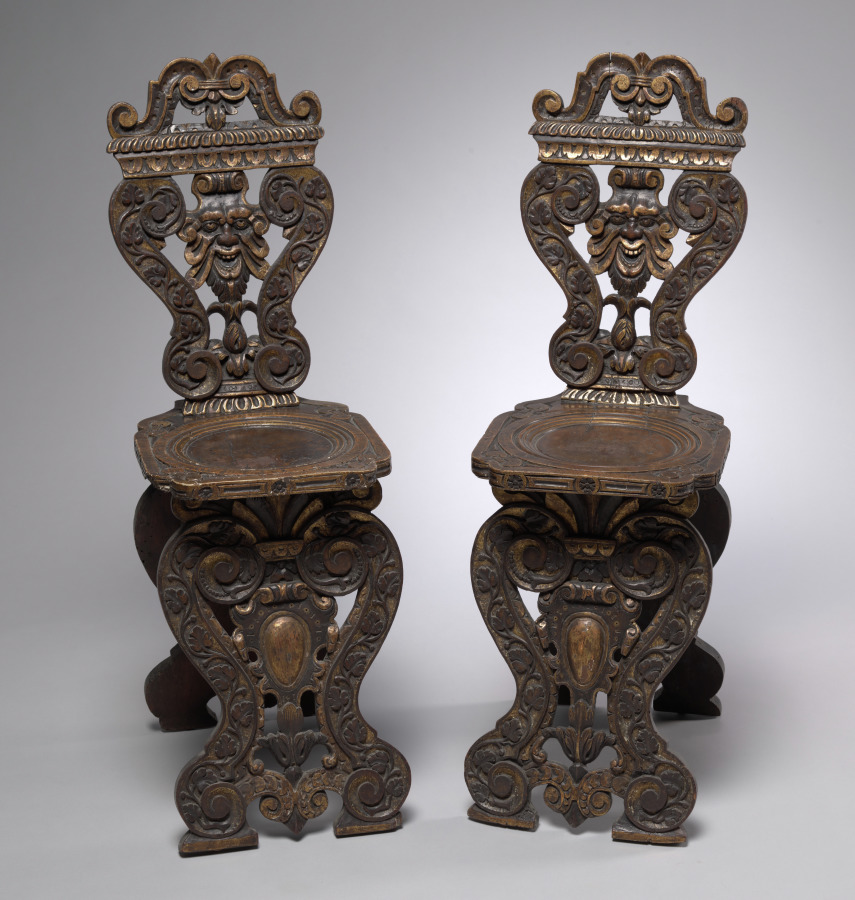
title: Pair of Chairs, Sgabello type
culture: Italy, late 16th century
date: late 1500s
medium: walnut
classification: Furniture and woodwork